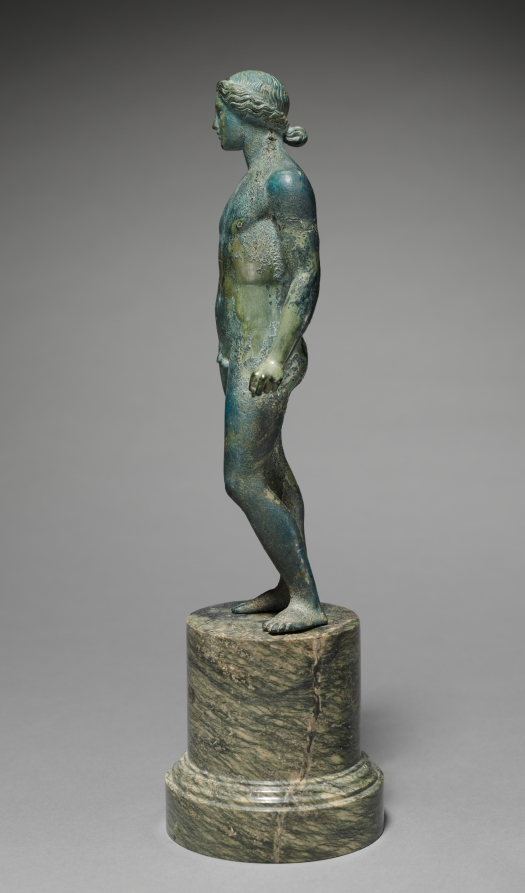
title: Athlete or Apollo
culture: Greece, Macedonia(?)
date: probably 100–1 BCE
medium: bronze with silver inlays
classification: Sculpture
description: This bronze statuette depicts a nude male, perhaps a young athlete or the youthful god Apollo. The figure is made from solid bronze, with a fillet of inlaid silver on his head. The figure’s right arm is broken off just above the elbow. If this is a statue of Apollo, he may have once held a bow and arrow; if it depicts an athlete, he could have held athletic equipment, a symbol of victory, or an offering dish.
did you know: The eyes of this figure are decorated with inlaid silver.